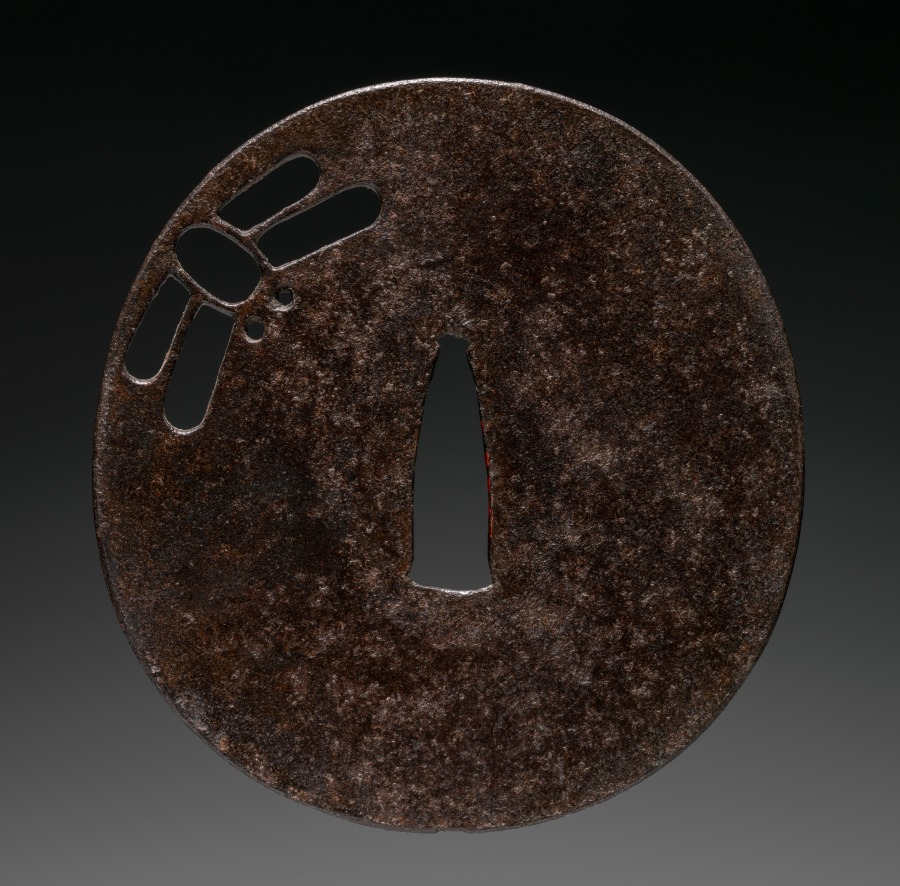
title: Sword Guard (Tsuba) with Dragonfly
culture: Japan, possibly Edo period (1615-1868)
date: c. 1615–1868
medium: iron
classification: Arms and Armor